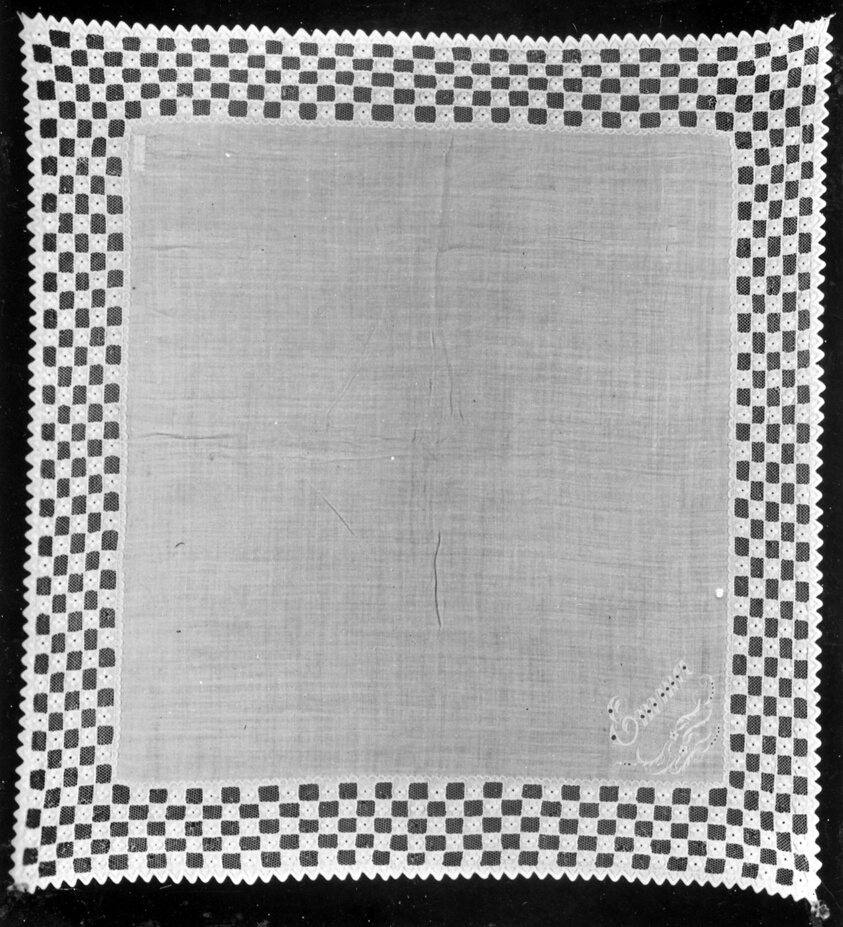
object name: Textile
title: Handkerchief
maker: England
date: 1875/1900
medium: Linen, plain weave; cut and drawn thread work backed by cotton, machine made "twist net"; and embroidered with cotton in buttonhole, eyelet, padded overcast, and padded satin stitches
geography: England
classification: textile; needlework - lace; accessories (object genre); weaving